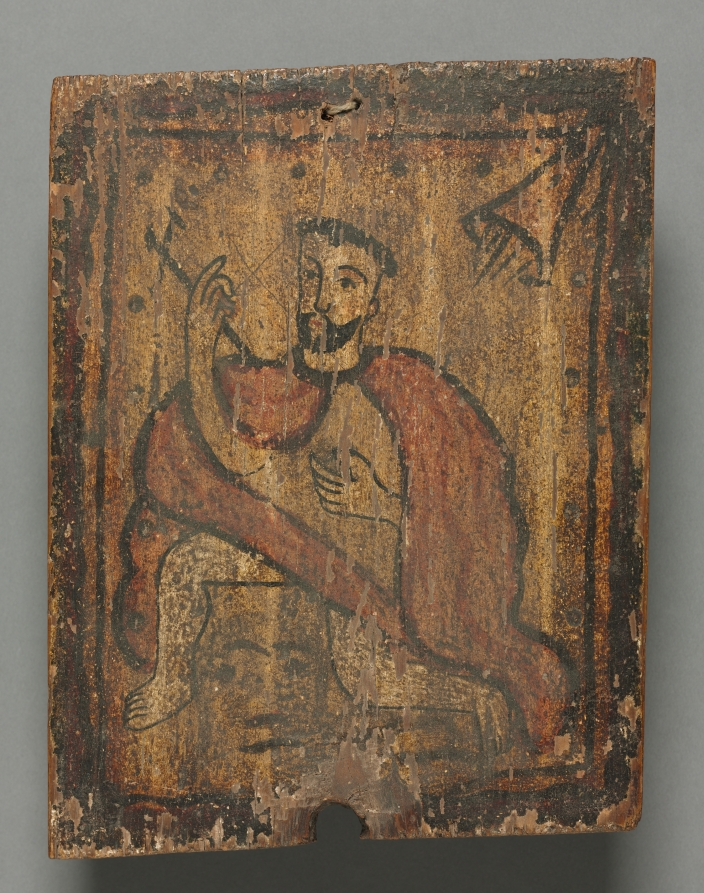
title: San Geronimo: santo de retablo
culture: America, New Mexico, 17th-18th century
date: 1600s-1700s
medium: oil on wood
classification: Painting